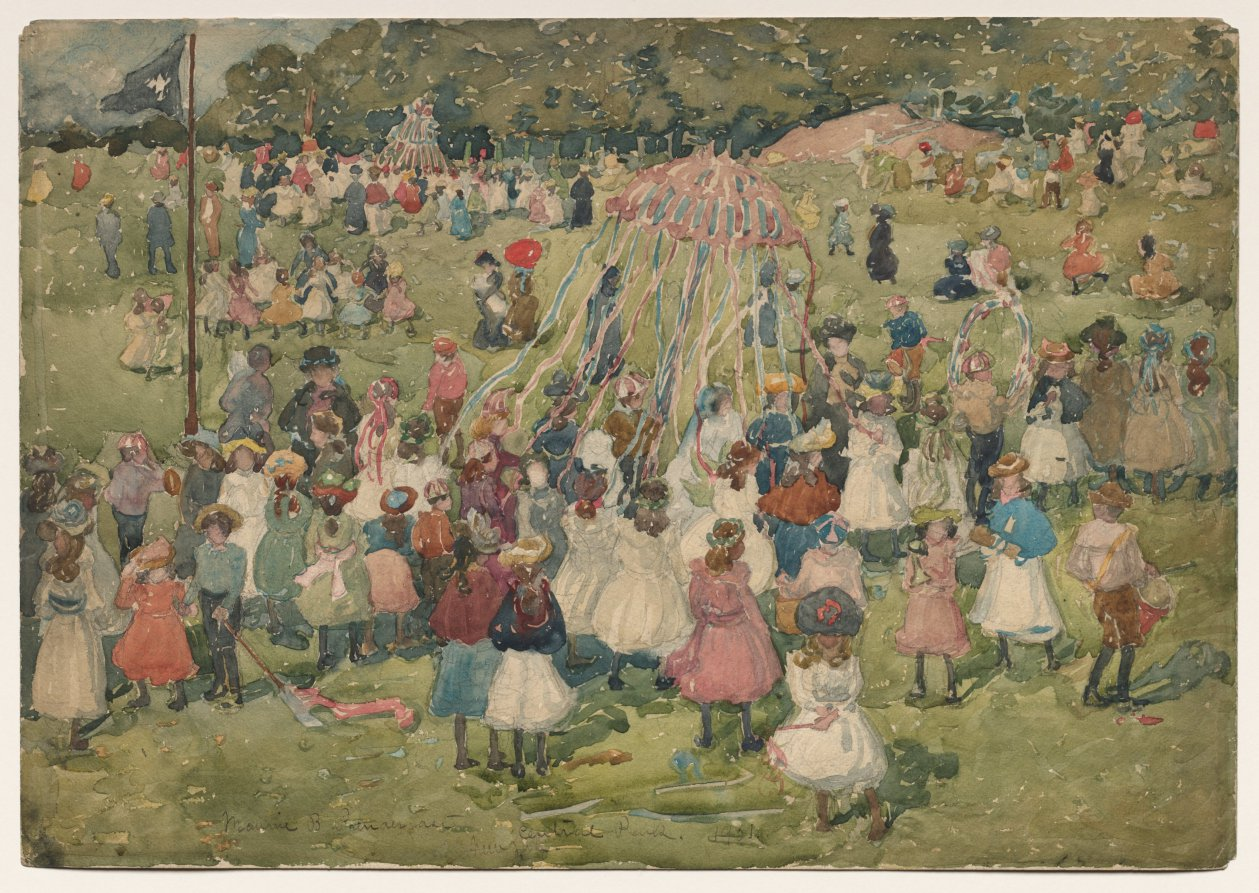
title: May Day, Central Park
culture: America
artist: Maurice Prendergast (American, born Newfoundland [now Canada], 1858–1924)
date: 1901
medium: watercolor over graphite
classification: Drawing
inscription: signed, across bottom, in brown ink: Maurice B. Prendergast Central Park. 1901. / New York.; verso, upper left, in graphite: No 22; center, in graphite: May Day Central Park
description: Maurice Prendergast worked primarily in watercolor, and Central Park—seen in this drawing— was one of his favorite subjects. He regularly visited the popular public area in New York City during the early 1900s, while he was living in Boston. Prendergast's depictions of Central Park often focus on festivities and celebrations, continuing a theme he had explored in other cities, such as Paris and Venice. Here, the artist depicted children celebrating May Day by dancing with colorful ribbons around a Maypole on a sunny day. He worked with rapid, loose marks, leaving portions of the paper visible to create highlights throughout. Prendergast was drawn to this subject, and revisited it many times.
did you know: Maurice Prendergast studied in Paris and was influenced by the French Impressionists and their focus on modern urban life.